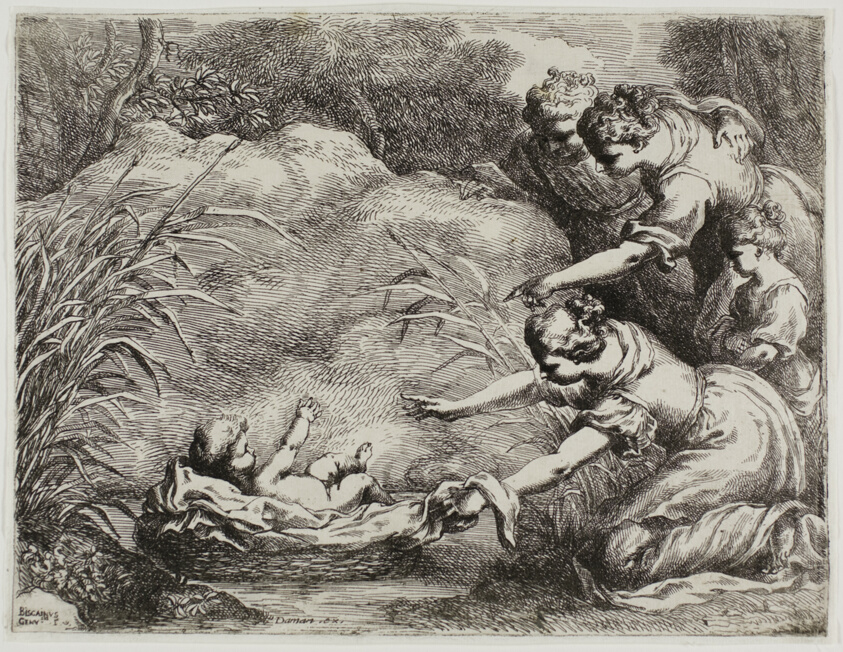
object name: Print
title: The Finding of Moses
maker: Bartolomeo Biscaino (Italian, before 1629-1657)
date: c. 1655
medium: Etching on ivory laid paper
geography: Italy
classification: etching; print; prints and drawing